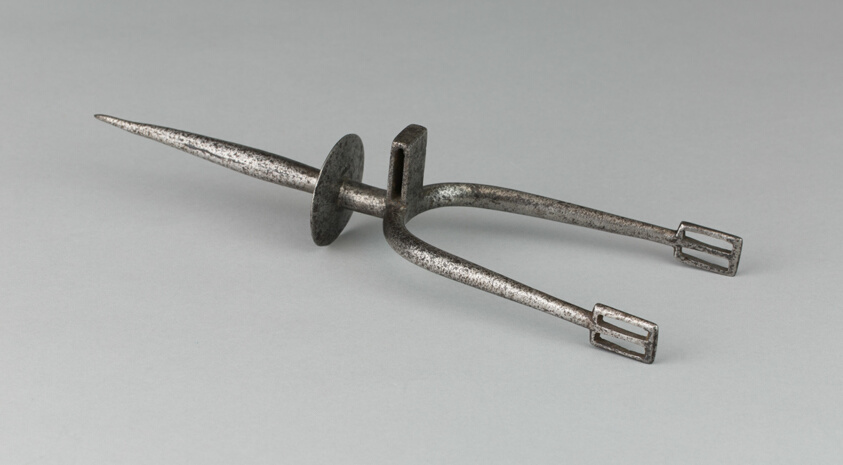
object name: Armor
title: Prick Spur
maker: Bierg African (Morrocan?)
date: c. 1800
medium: Steel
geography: North Africa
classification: horse equipment; armor; arms and armor